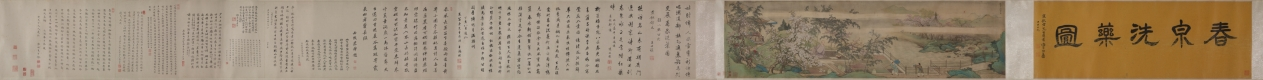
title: Cleansing Medicinal Herbs in the Stream on a Spring Day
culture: China, Qing dynasty (1644-1911)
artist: Yu Zhiding (Chinese, 1647–c. 1716)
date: 1703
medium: Handscroll; ink and color on silk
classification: Painting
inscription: Title by Chen Yixi.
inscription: 姑射仙人冰雪膚，新詩傳唱滿通都。/ 極知遲暮難為別，更展春泉洗藥圖。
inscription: Colophon by Chen Tingjing 陳廷敬 (1639–1712). Colophon by Wang Hongxu 王鴻緒 (1645–1723), dated 1707. Colophon by Song Luo 宋犖 (1634–1714). Colophon by Liu Yan 劉巗. Colophon by Jing Xikui 涇西夔. Colophon by Liu Yan 劉巗. Colophon by Cao Yin 曹寅. Colophon by Wang Shihong 汪士鋐. Colophon by Wang Shidan 王式丹 (1645–1718), dated 1712. Colophon by Shi Shenyi 史申義 (1661–1712), dated 1712. Colophon by Yin Yuqing 殷餘慶, dated 1712.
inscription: Colophon by Chen Shixia 陳時夏, dated 1729.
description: A famous portraitist, Yu Zhiding here depicts the likeness of Shi Shenyi 史申義 (1661–1712), an official and poet. Master Shi, a sickly man, was deeply interested in medicinal science. The opening section of the scroll features a boy washing a fungus in fresh spring water, a basket of medicinal herbs by his side. Other servants carry a fan, a bundle of scrolls, and a cup of tea or hot wine. Master Shi sits in a bamboo grove, surrounded by fields of herbs. Returning swallows, pink peach blossoms, and blooming magnolia indicate spring, whereas the fungus conveys wishes for long life. The spring theme may express the artist’s wish for his friend’s recovery.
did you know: In the pavilion are some of Shi Shenyi’s scholarly accoutrements: a stack of books, an antique zun 尊 (wine vessel), a brush holder, an ink stone, and a small chime.